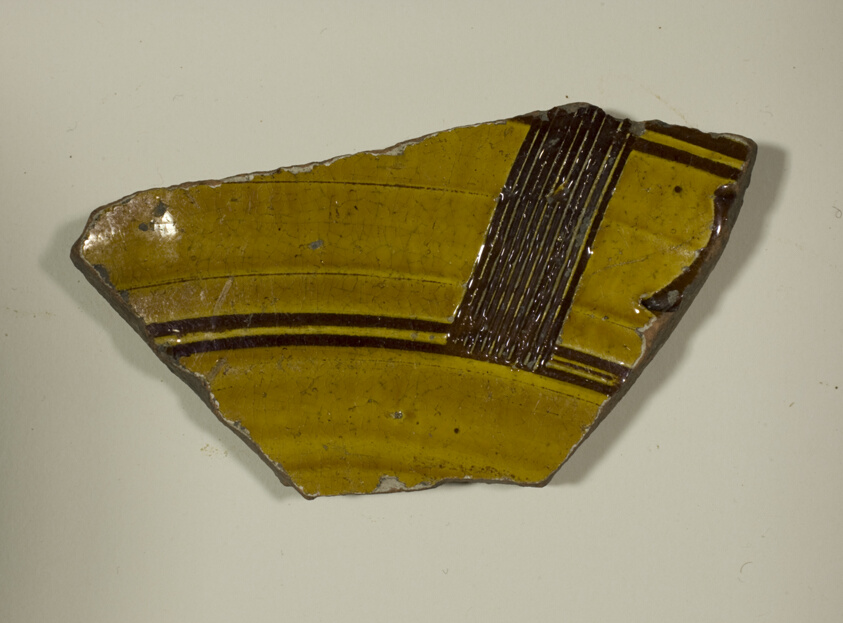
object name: Decorative Arts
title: Fragment of a Bowl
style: byzantine, european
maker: Byzantine (Asia Minor, Constantinople)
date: 13th-14th century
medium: Ceramic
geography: Istanbul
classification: fragment; ceramics; vessel; bowl; asian art; decorative arts